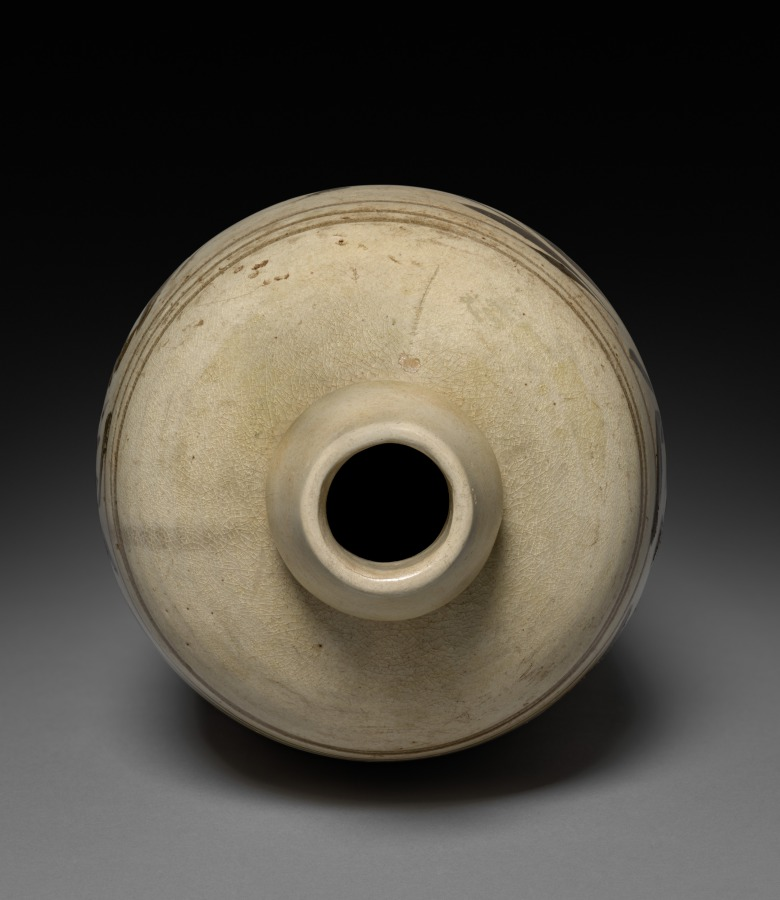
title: Meiping (Plum Blossom) Vase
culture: China, Northern Song dynasty (960-1127) - Jin dynasty (1115-1234)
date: 1100s–1200s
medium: Buff stoneware, slip coated with painted underglaze decoration, Cizhou ware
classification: Ceramic